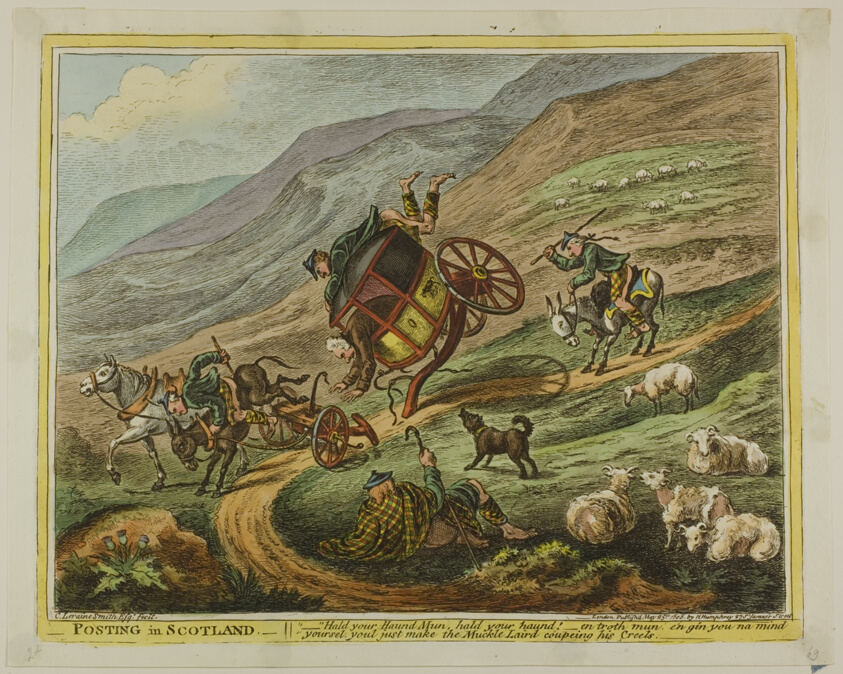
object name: Print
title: Posting in Scotland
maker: James Gillray (English, 1756-1815); published by Hannah Humphrey (English, c. 1745-1818)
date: published May 25, 1805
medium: Hand-colored etching and aquatint on paper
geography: England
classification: etching; print; prints and drawing